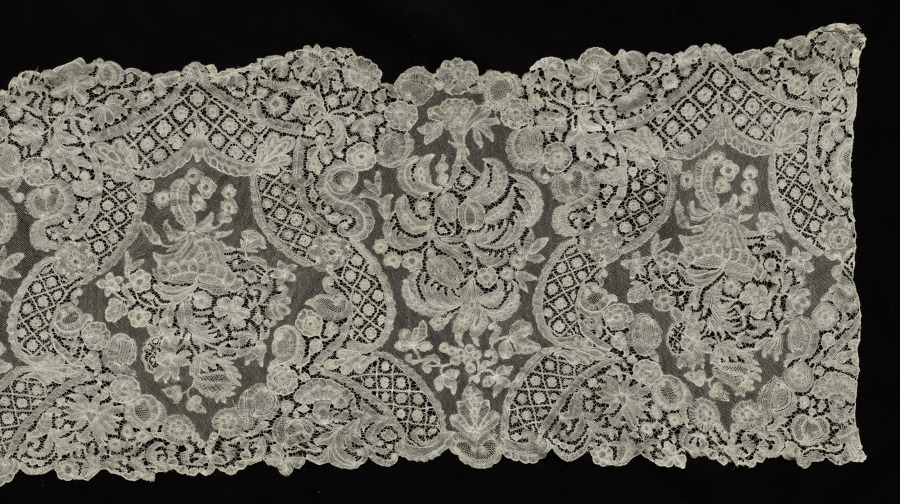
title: Lace Flounce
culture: Belgium, Brabant(?)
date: 1740–60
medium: Linen: bobbin lace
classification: Lace